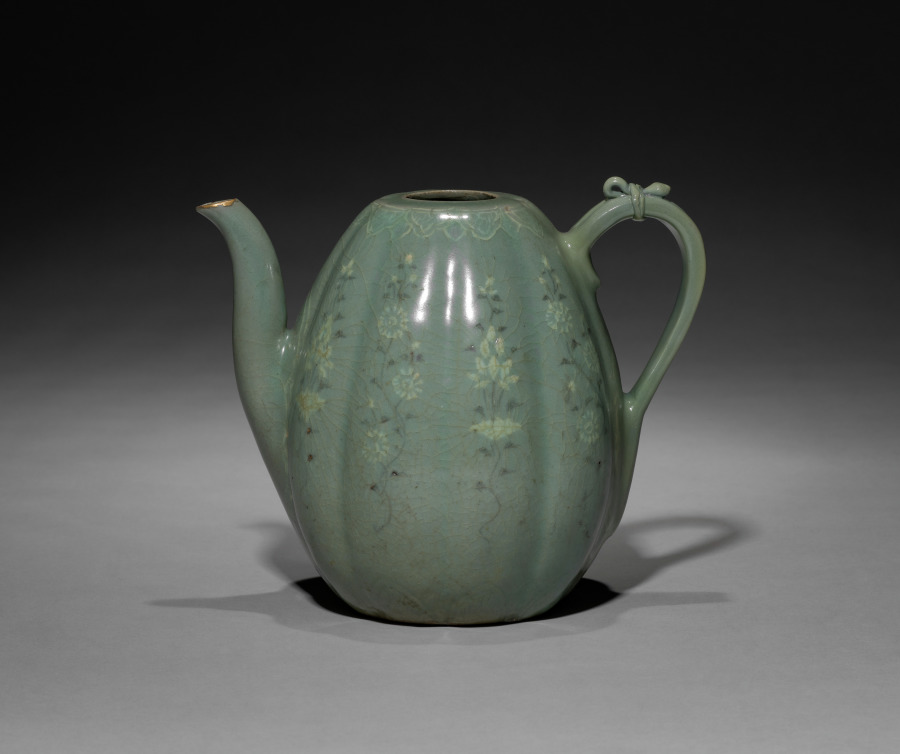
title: Melon-shaped Ewer with Incised Peony Design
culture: Korea, Goryeo dynasty (918–1392)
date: 918–1392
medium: pottery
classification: Ceramic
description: This melon-shaped pitcher is adorned with a delicate drawing that renders chrysanthemum buds with full blossoms in white and black inlays. In Korea, chrysanthemum flowers and leaves were made into both tea and wine. Chrysanthemum wine was enjoyed during the the Double Nine Festival (the ninth day of the ninth month in the lunar calendar) when praying for longevity.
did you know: The shape of this pitcher resembles a type of yellow muskmelon cultivated mainly in East Asia.